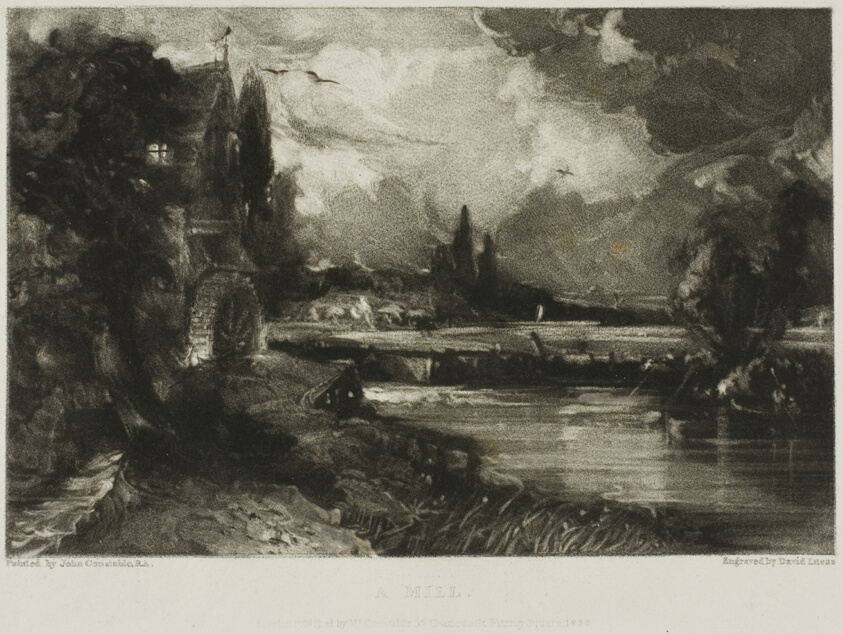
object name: Print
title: A Mill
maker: David Lucas (English, 1802-1881); after John Constable (English, 1776-1837)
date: 1830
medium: Mezzotint on paper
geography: England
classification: mezzotint; print; prints and drawing